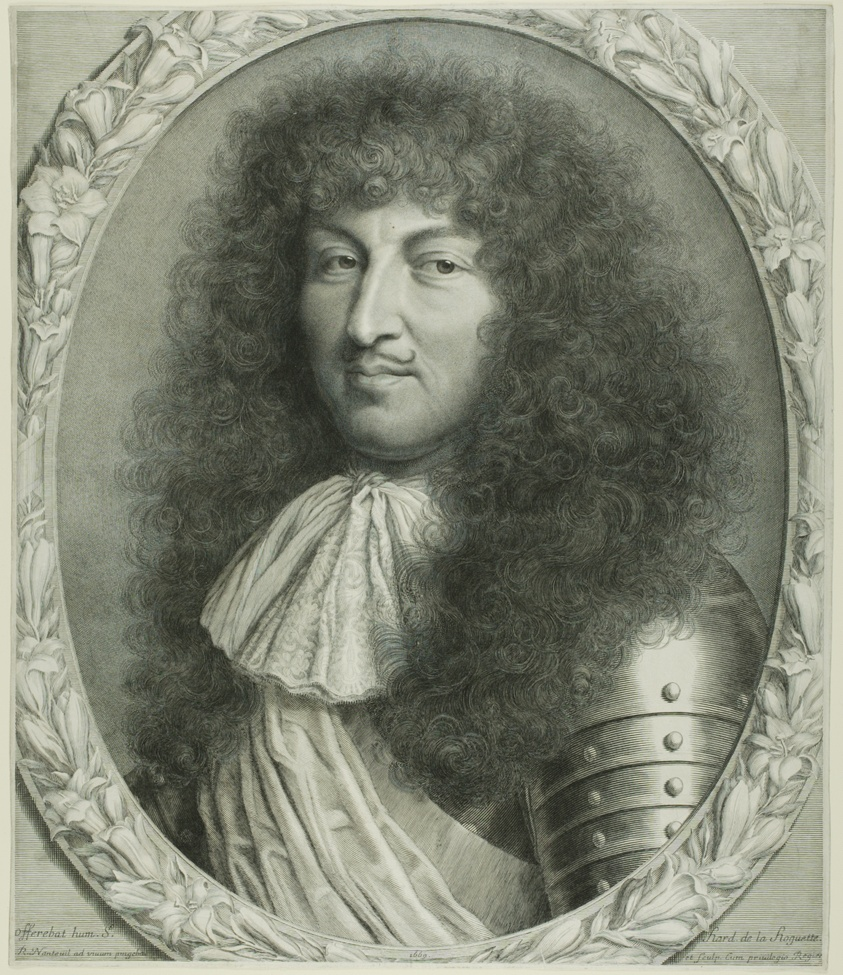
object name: Print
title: Louis XIV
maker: Robert Nanteuil (French, 1623-1678)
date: 1669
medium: Engraving in black on paper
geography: France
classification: engraving; print; prints and drawing